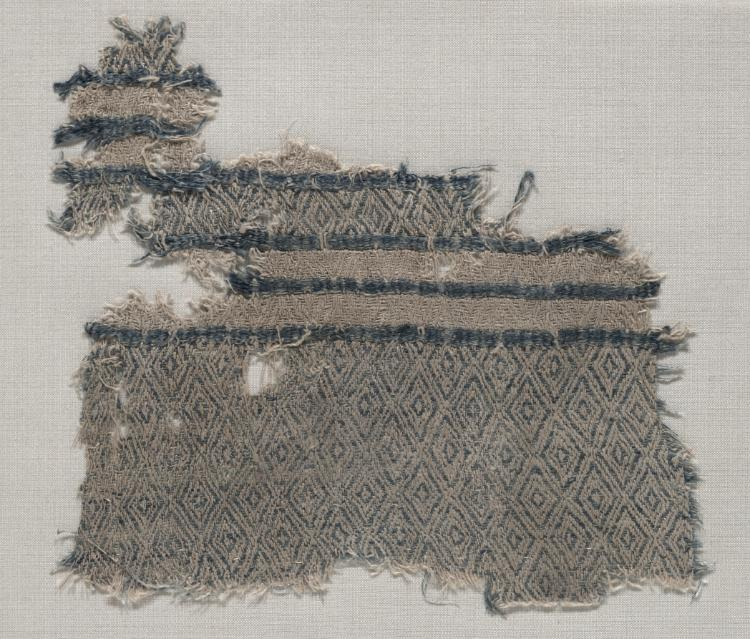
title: Fragment of linen damask with diamond designs in bands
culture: Egypt, Fatimid period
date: probably 1000s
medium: lozenge twill with areas of weft floats: linen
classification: Textile